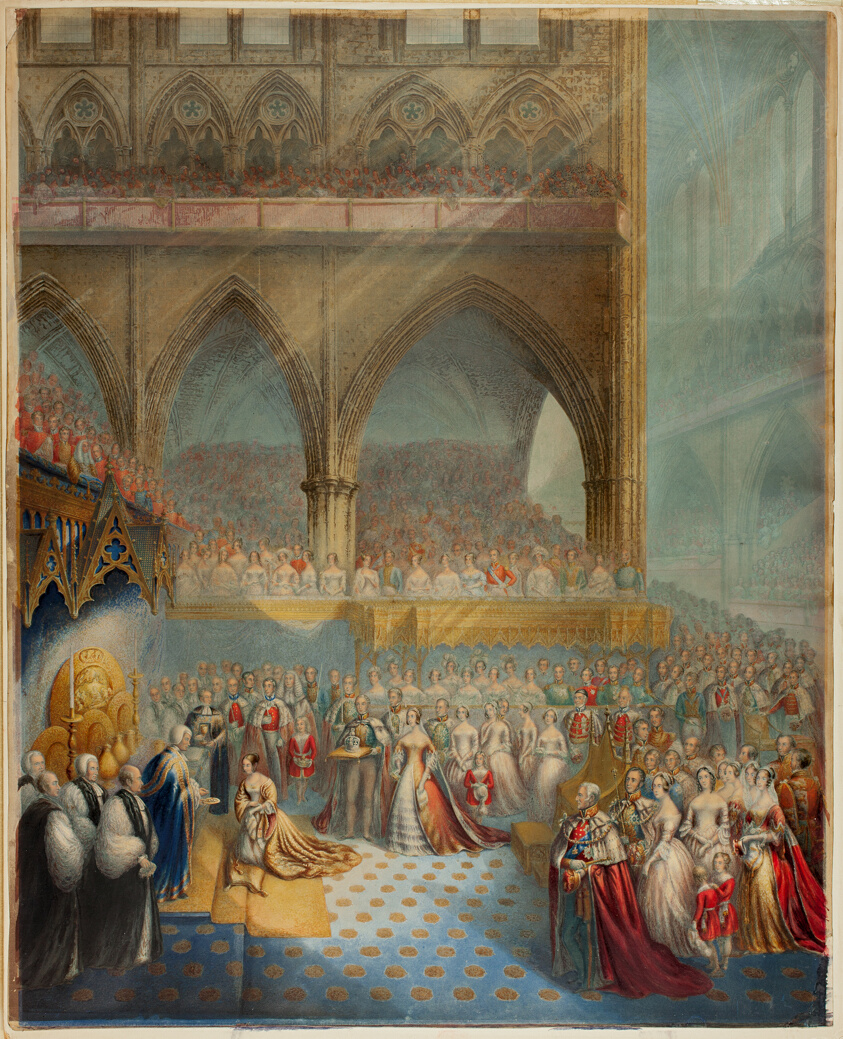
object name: Print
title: Her Most Gracious Majesty Queen Victoria Receiving the Sacrament at her Coronation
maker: George Baxter (English, 1804-1867)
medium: Steel engraving colored with wooden blocks on paper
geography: England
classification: wood engraving; print; prints and drawing